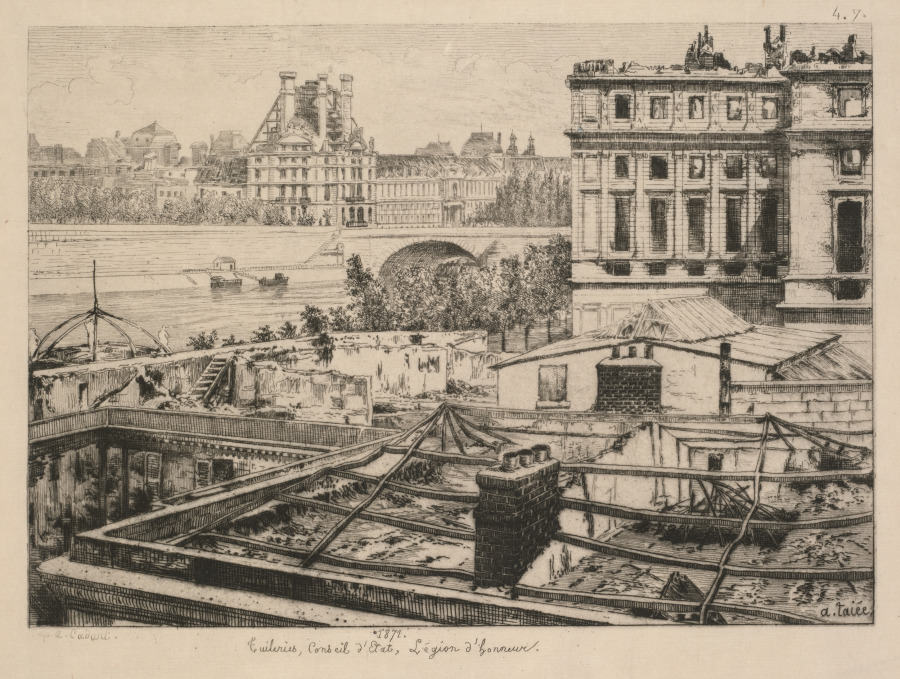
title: Tuileries, Conseil d'Etat, Legion d'honeur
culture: France, 19th century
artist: Alfred Taiée (French, 1820–1881)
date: 1871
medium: etching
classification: Print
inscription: Numbered on plate, upper right: 4 - 7,. Signed on plate: A. Taiée, and dated: 1871. Lettered alongside bottom with title and production detail: Imp. A. Cadart. Printed by Alfred Cadart